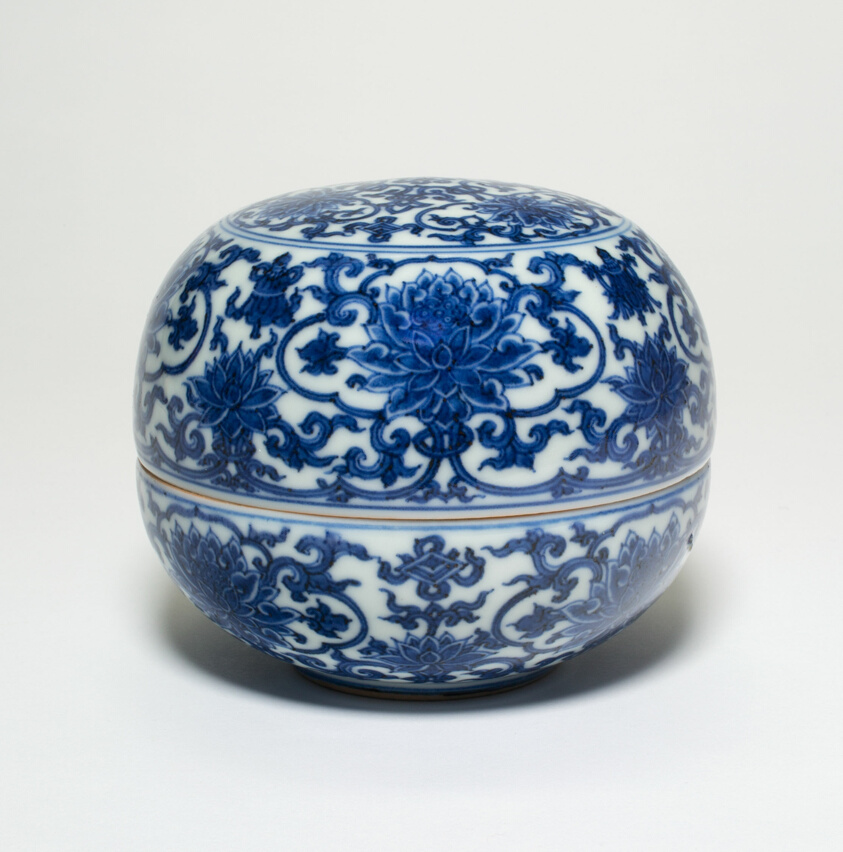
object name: Vessel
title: Covered Box with Lotus Flowers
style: Chinese (culture or style)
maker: China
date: Ming dynasty (1368–1644), Jiajing reign mark (1521–1567)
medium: Porcelain painted in underglaze blue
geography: China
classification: porcelain; asian art; ceramics; vessel